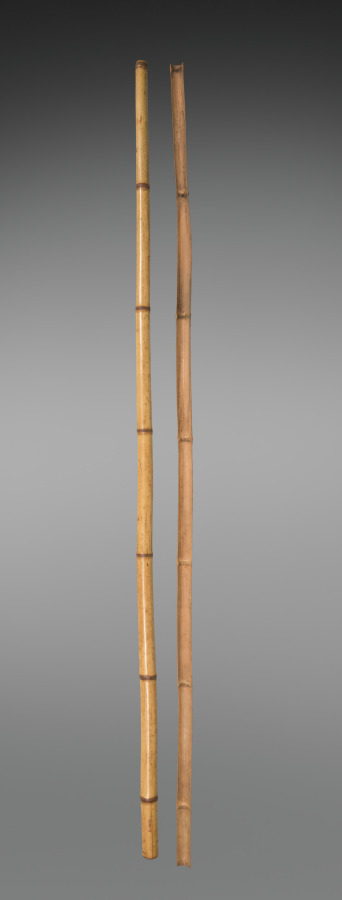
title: Bow: cloth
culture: Japan, Edo period (1615–1868)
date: early to mid-1800s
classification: Arms and Armor